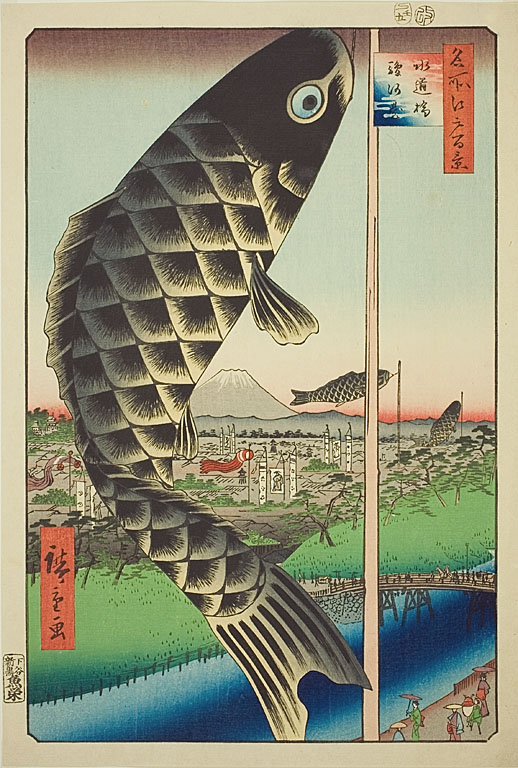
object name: Print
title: Suido Bridge and Surugadai (Suidobashi Surugadai), No.48 from the series "One Hundred Famous Views of Edo (Meisho Edo hyakkei)"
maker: Utagawa Hiroshige (Japanese, 1797-1858)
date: 1857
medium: Color woodblock print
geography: Japan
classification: woodblock print; print; asian art